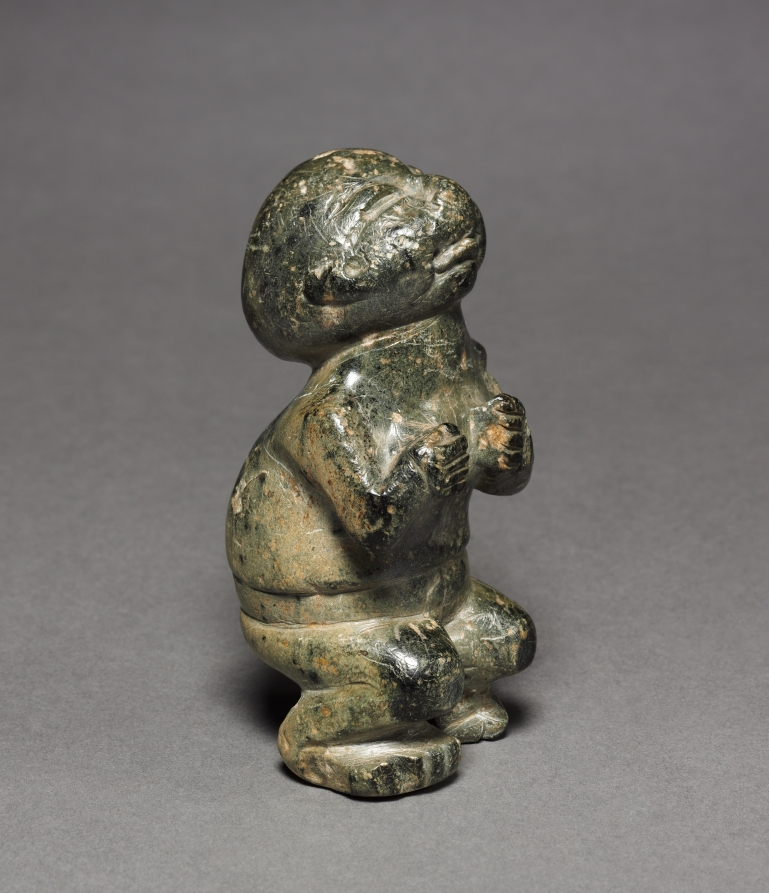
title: Crouching Figure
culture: Mexico, Guerrero, Olmec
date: 900–300 BCE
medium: serpentine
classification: Sculpture